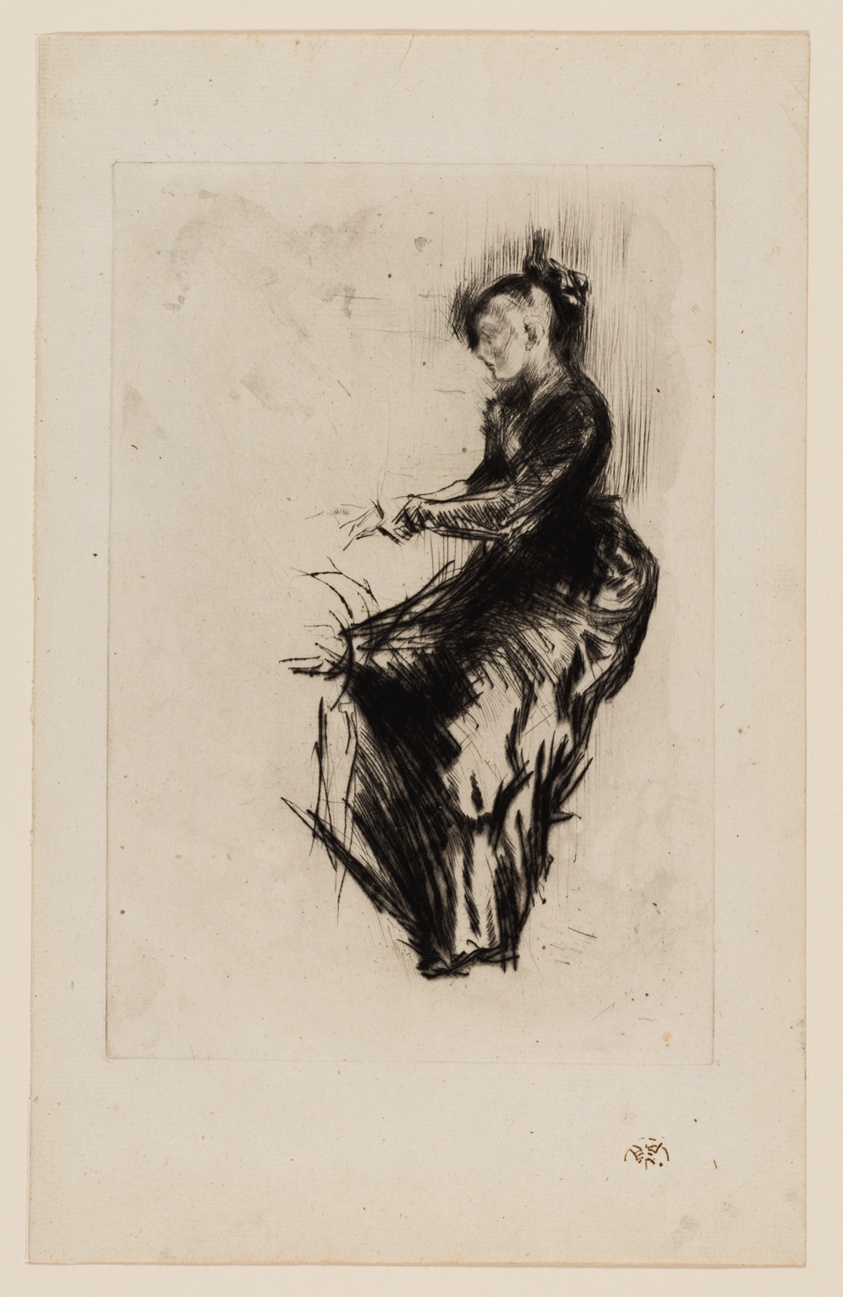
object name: Print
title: The Piano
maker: James McNeill Whistler (American, 1834-1903)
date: 1875–1877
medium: Drypoint and open bite in black ink on off-white laid paper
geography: United States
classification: drypoint; print; prints and drawing; paper